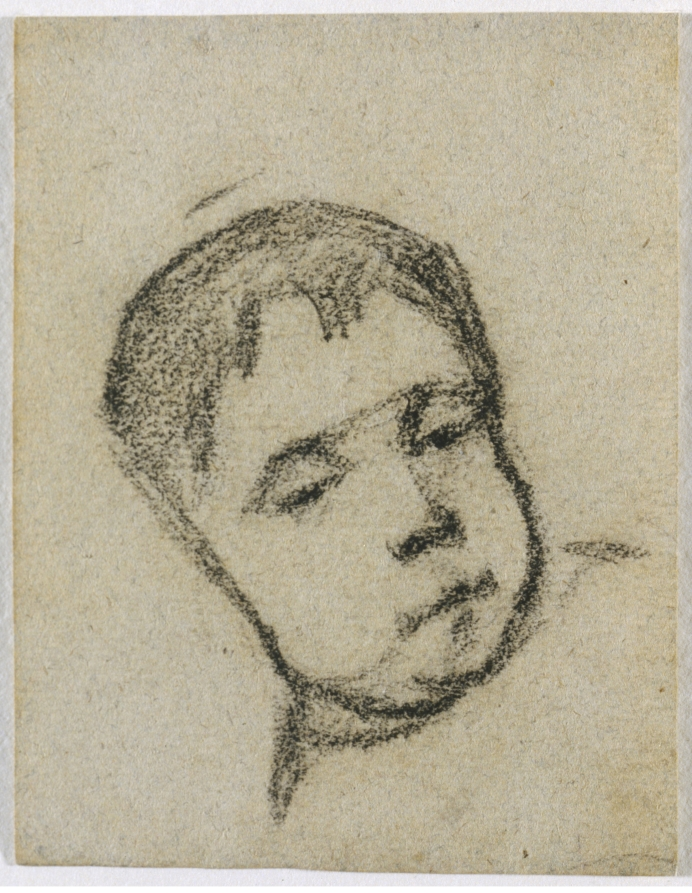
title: Emil Gauguin as a Child, Head on a Pillow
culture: France, 19th century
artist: Paul Gauguin (French, 1848–1903)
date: c. 1875–1876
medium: black crayon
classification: Drawing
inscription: VERSO, upper center, in graphite [?]: [illegible]stre